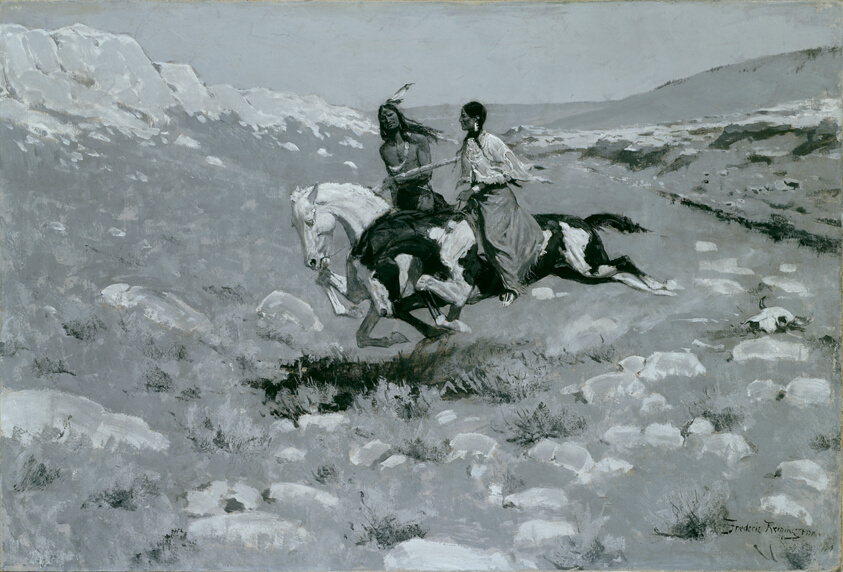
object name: Painting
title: Ceremony of the Fastest Horse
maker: Frederic Remington (American, 1861–1909)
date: c. 1900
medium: Oil on canvas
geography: New York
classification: painting; american arts